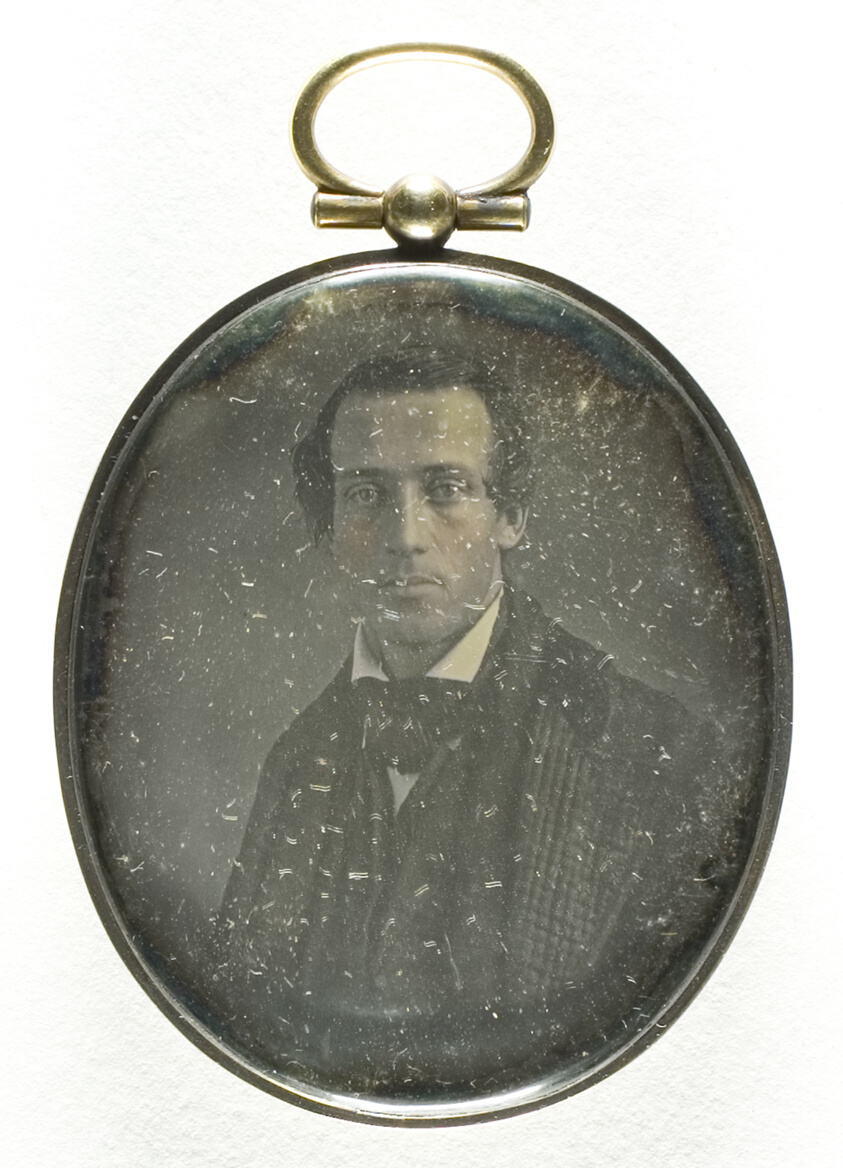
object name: Photograph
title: Locket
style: 19th century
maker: Artist unknown; American, 19th century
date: 1839/99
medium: Daguerreotype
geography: United States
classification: daguerreotype; photographic process; photography; photograph